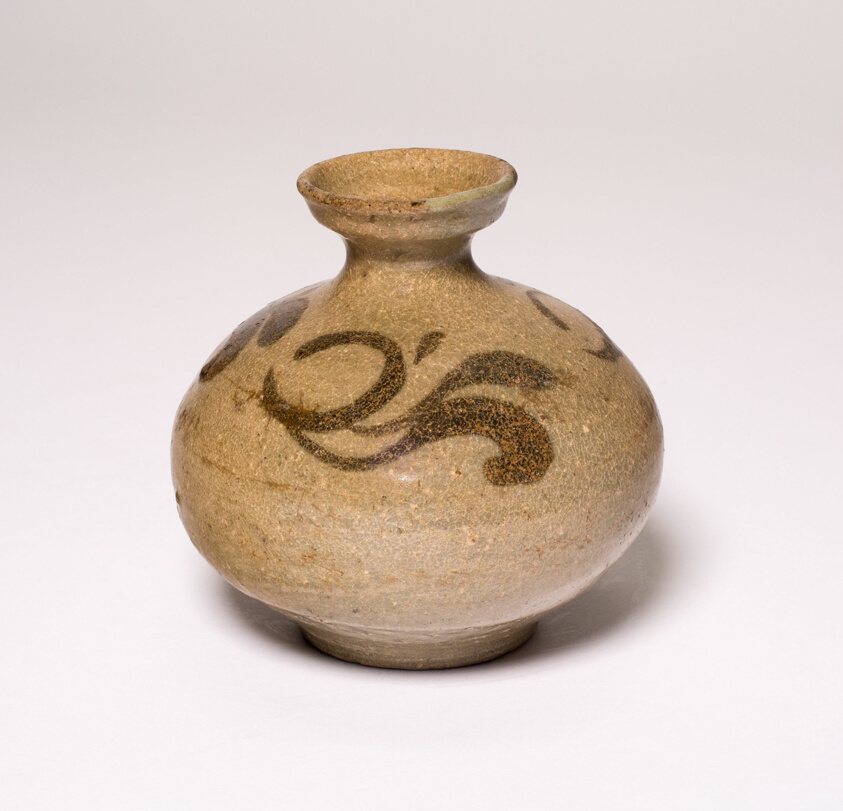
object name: Vessel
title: Oil Bottle with Floral Motifs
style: Korean (culture or style)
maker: Korea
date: Goryeo dynasty (918–1392), early 11th century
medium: Stoneware with celadon glaze and iron-brown underglaze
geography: Korea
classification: stoneware; ceramics; asian art; vessel